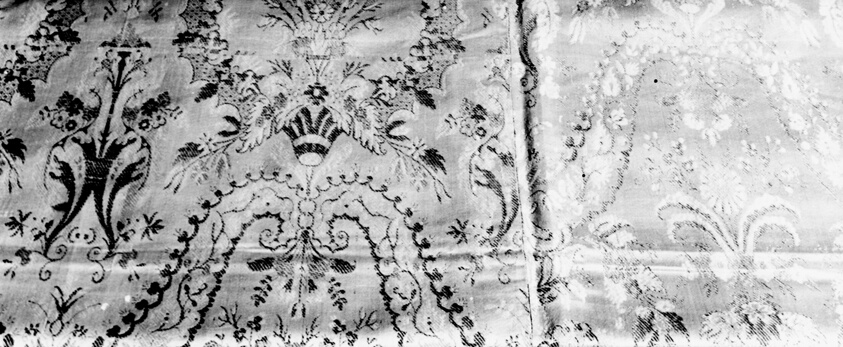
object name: Textile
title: Panel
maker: France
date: 1701/25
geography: France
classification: textile; weaving